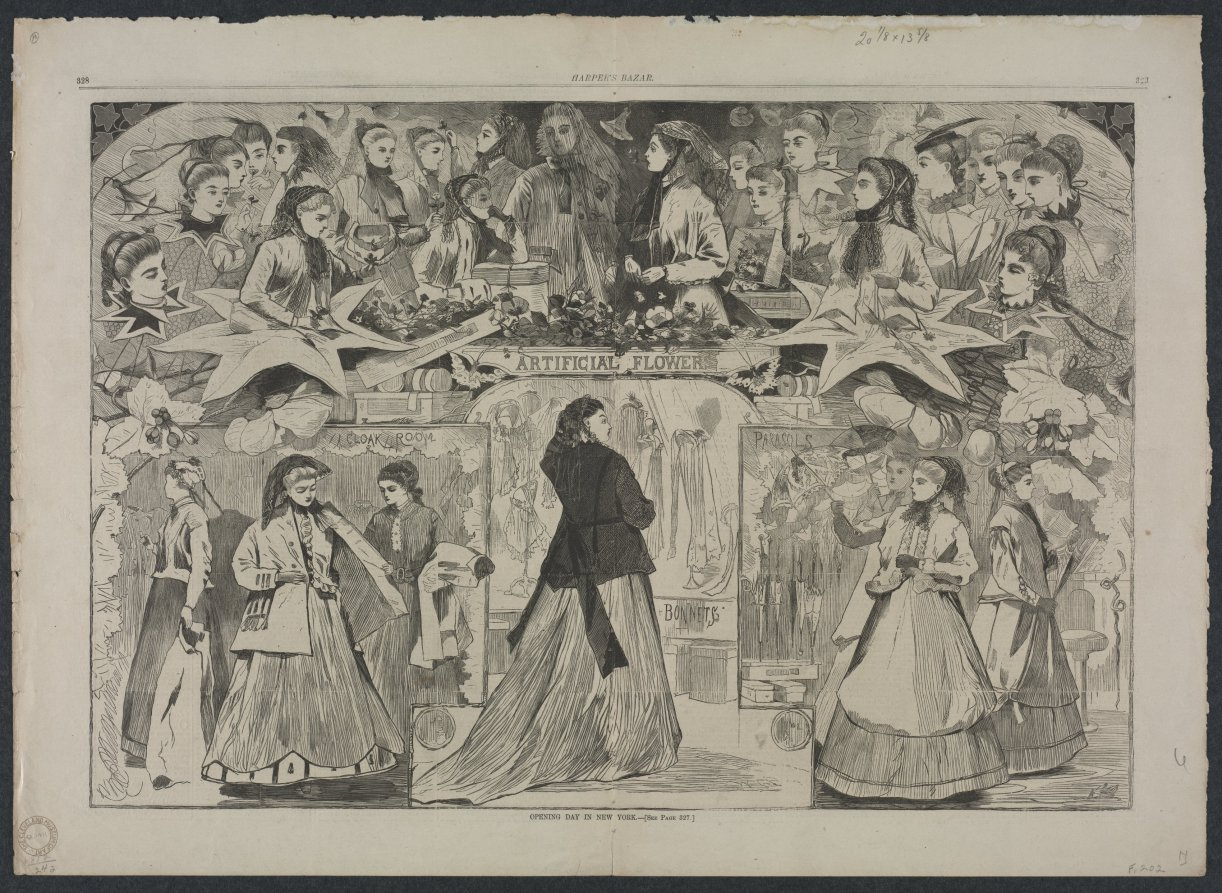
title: Opening Day in New York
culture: America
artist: Winslow Homer (American, 1836–1910)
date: 1868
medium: wood engraving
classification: Print